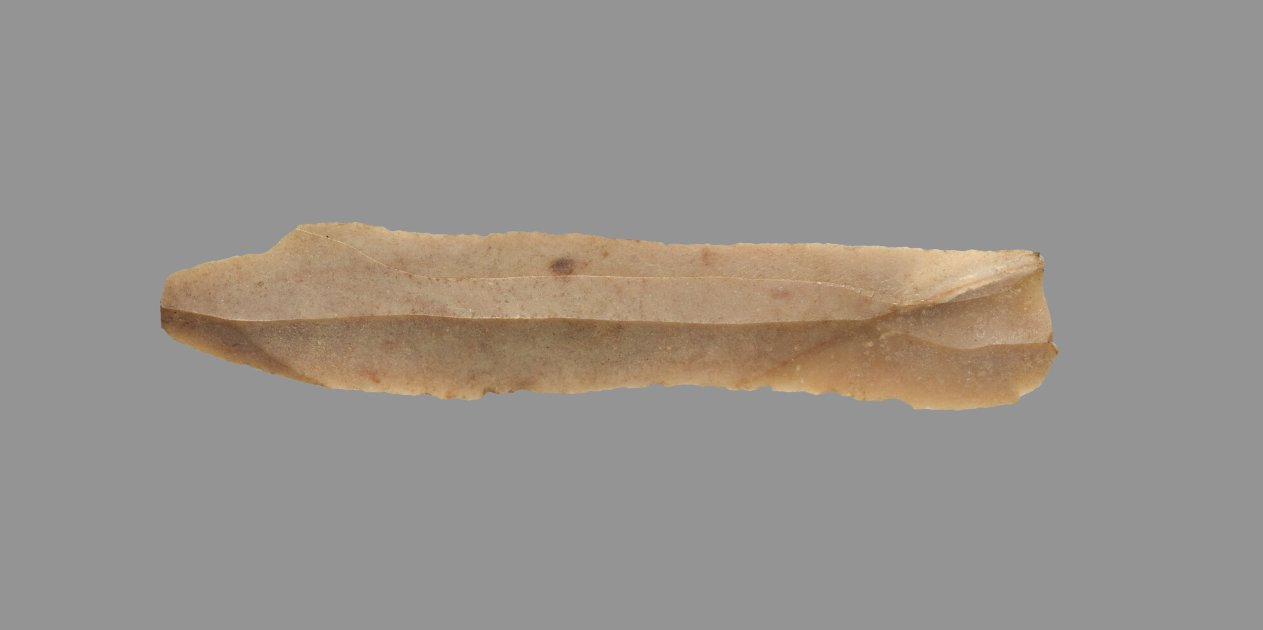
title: Sickle Blade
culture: Egypt, Middle Kingdom (2040–1648 BCE), Dynasty 12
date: 1980–1801 BCE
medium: flint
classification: Implements